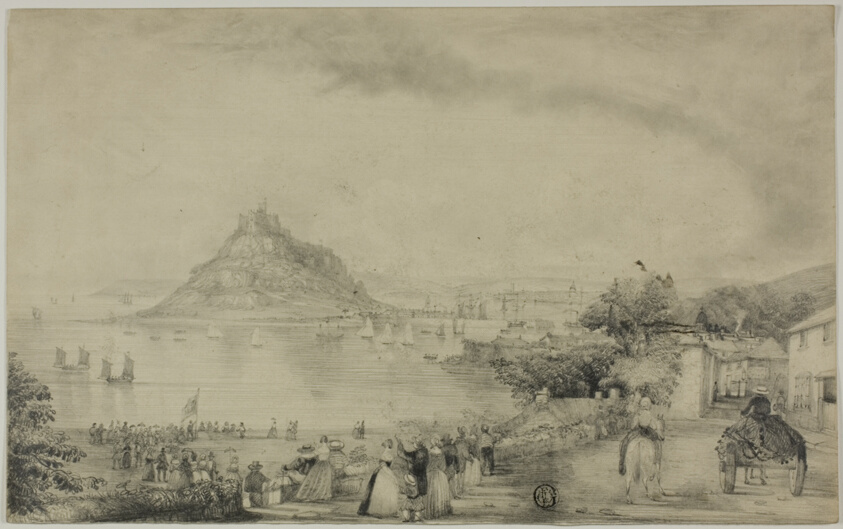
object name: Drawing and Watercolor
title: Saint Michael's Mount, Cornwall: Regatta Scene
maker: J. G. Doyle (English, n.d.)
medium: Graphite, with stumping, on cream wove card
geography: England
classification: graphite; drawings (visual works); prints and drawing